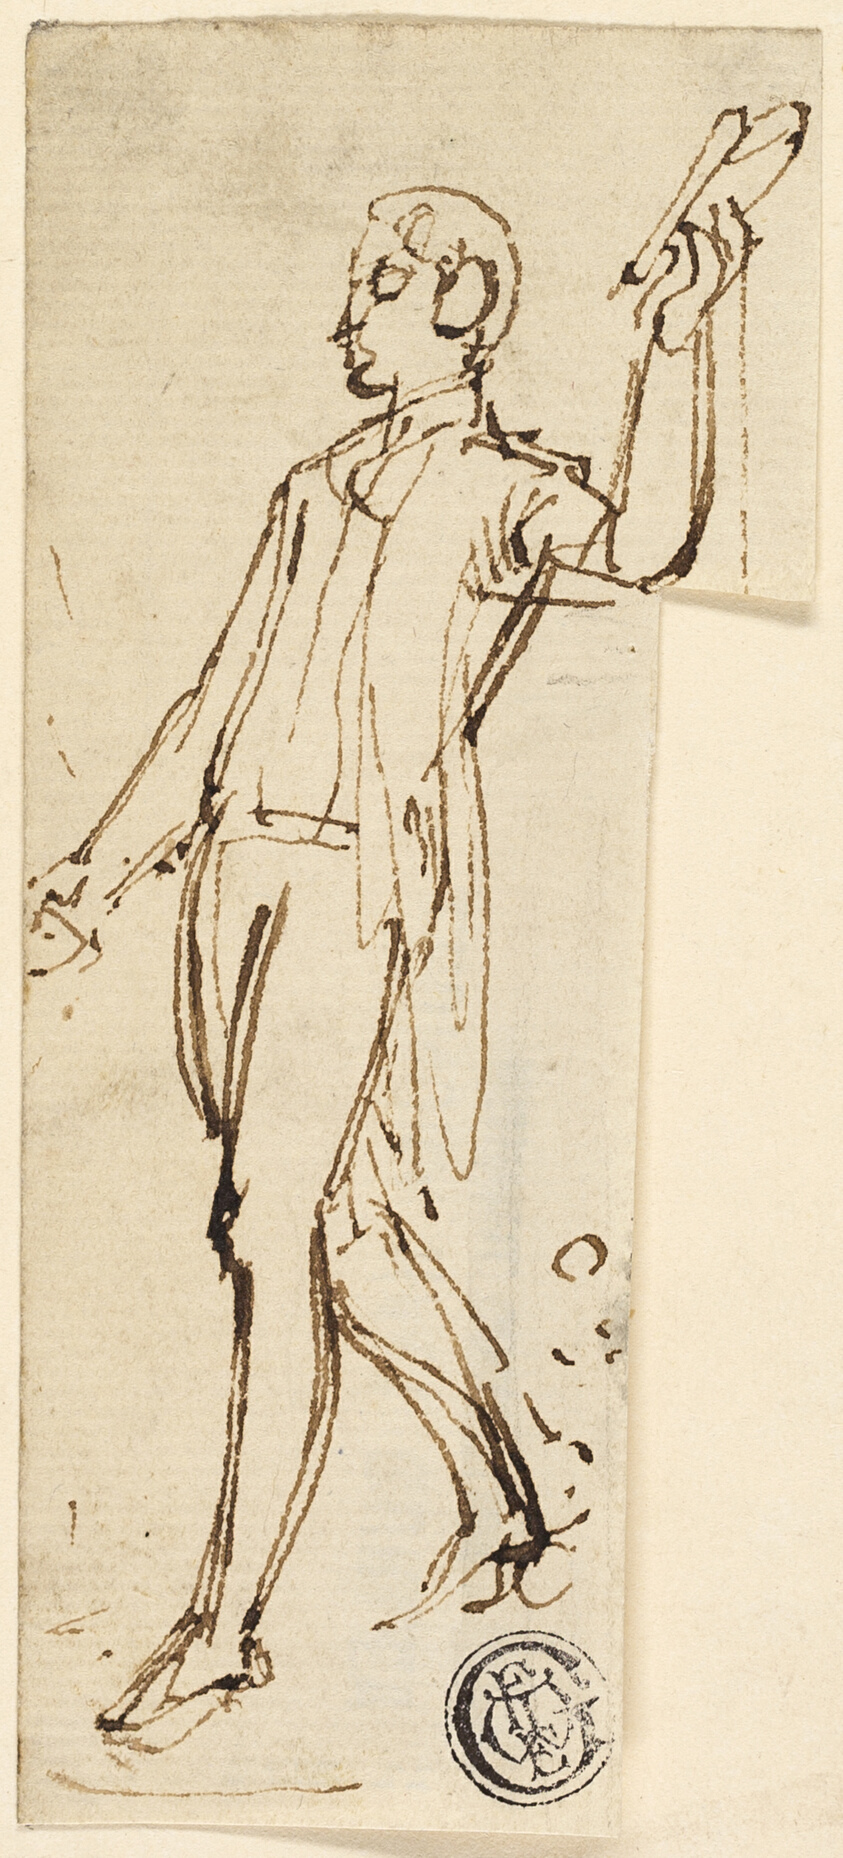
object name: Drawing and Watercolor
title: Sketch of Standing Man with Uplifted Arm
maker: Attributed to Thomas Stothard; English, 1755-1834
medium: Pen and brown ink on ivory laid paper, tipped onto board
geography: England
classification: pen and ink drawings; drawings (visual works); prints and drawing